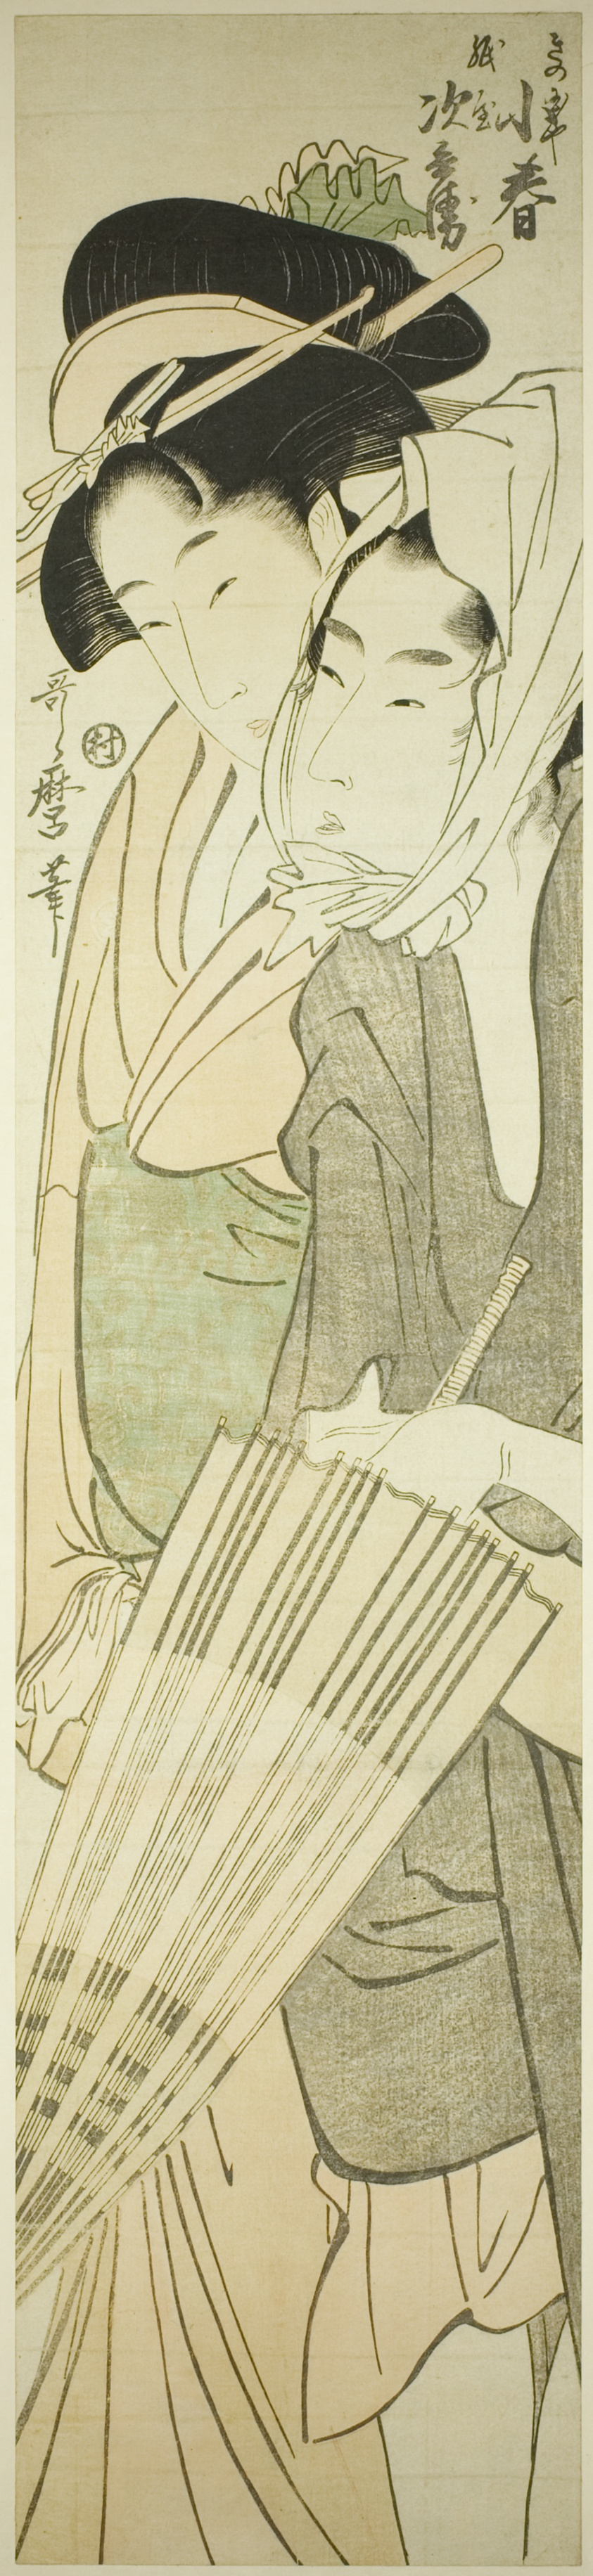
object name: Print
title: Koharu of the Kinokuniya and Kamiya Jihei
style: Japanese (culture or style)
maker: Kitagawa Utamaro 喜多川 歌麿; Japanese, 1753 (?)-1806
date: c. 1800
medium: Color woodblock print; hashira-e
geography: Japan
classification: woodblock print; print; asian art